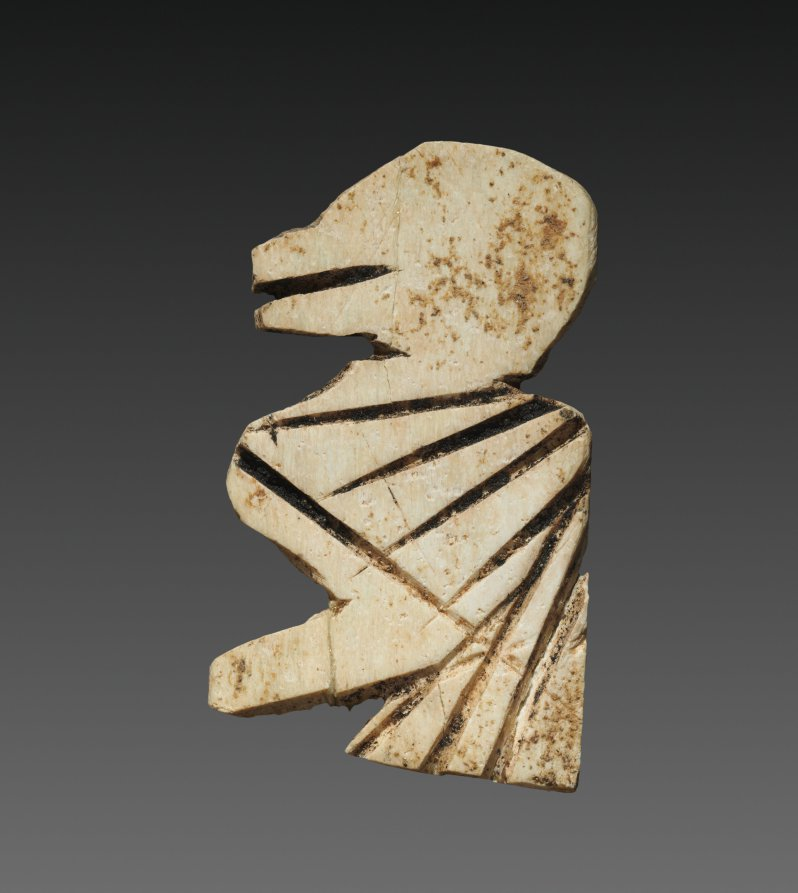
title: Stylized Bird: Decorative Inlay for a Box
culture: Israel, possibly Jericho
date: c. 2000 BCE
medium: bone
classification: Ivory